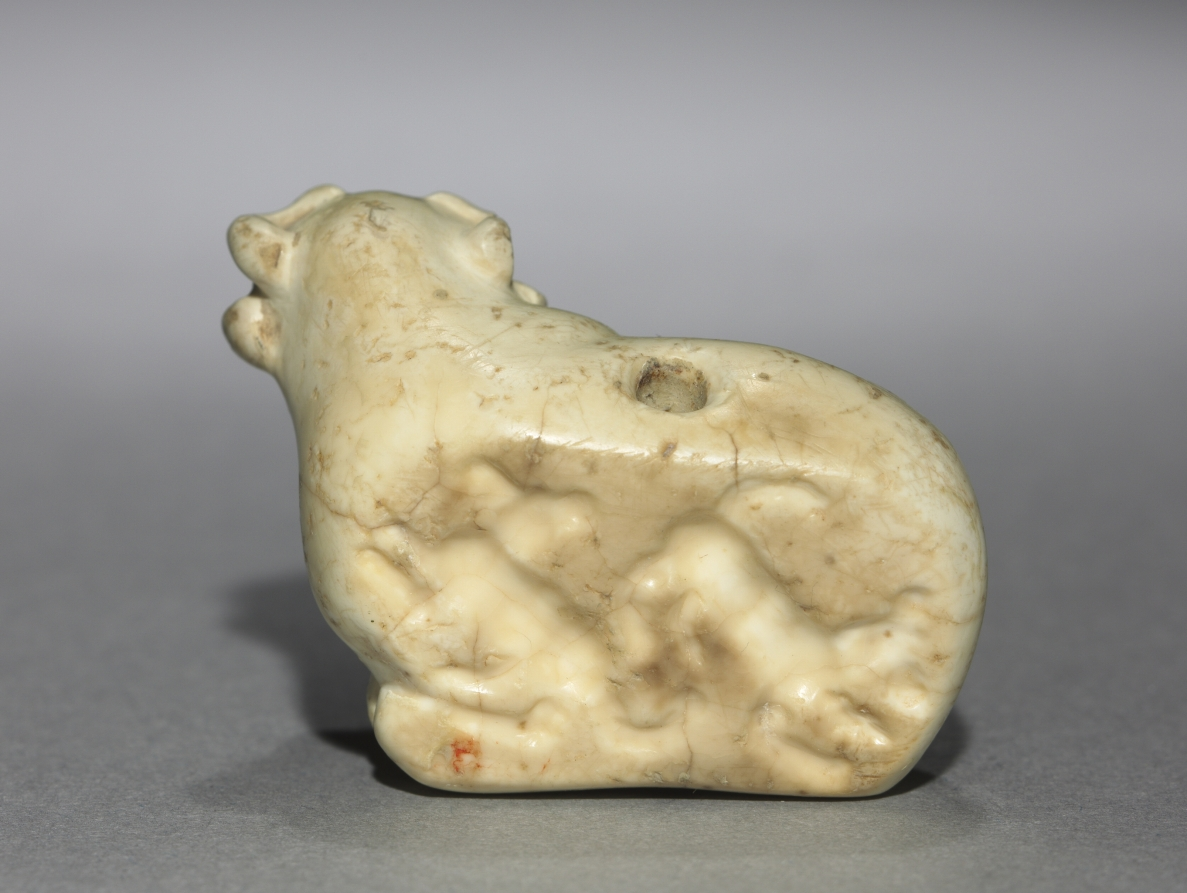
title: Amulet Seal in the Form of a Bull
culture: Mesopotamia, Sumerian, Iraq, Early Bronze Age I (c. 3300–3000 BCE)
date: c. 3250 BCE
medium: limestone with black stone inlaid eyes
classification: Amulets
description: The underside of this figure is incised with two running animals to make a seal; when pressed into a soft material, it leaves an impression.